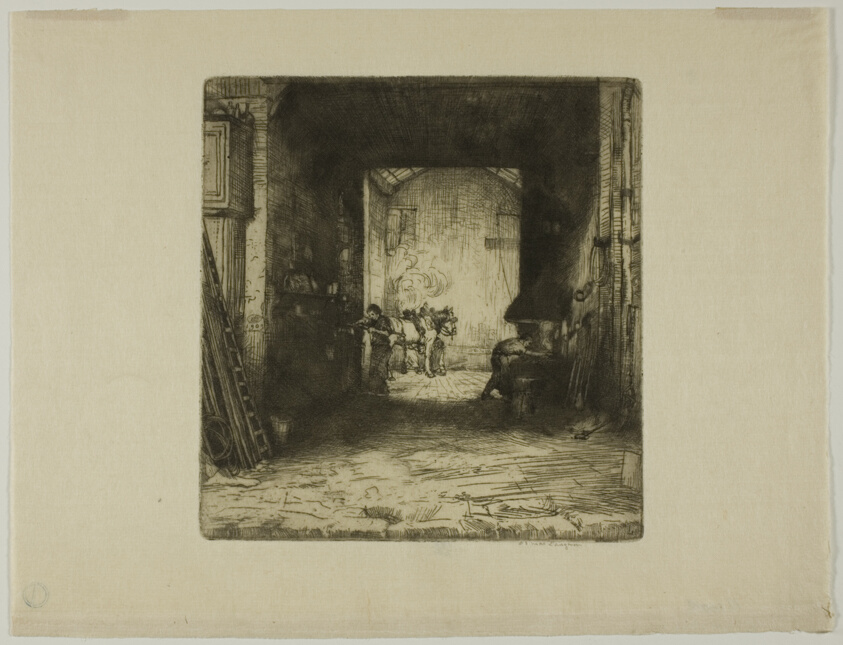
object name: Print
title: The Little Forge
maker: Donald Shaw MacLaughlan (American, born Canada, 1876-1938)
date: 1902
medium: Etching in black on Japanese paper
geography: United States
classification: etching; print; prints and drawing